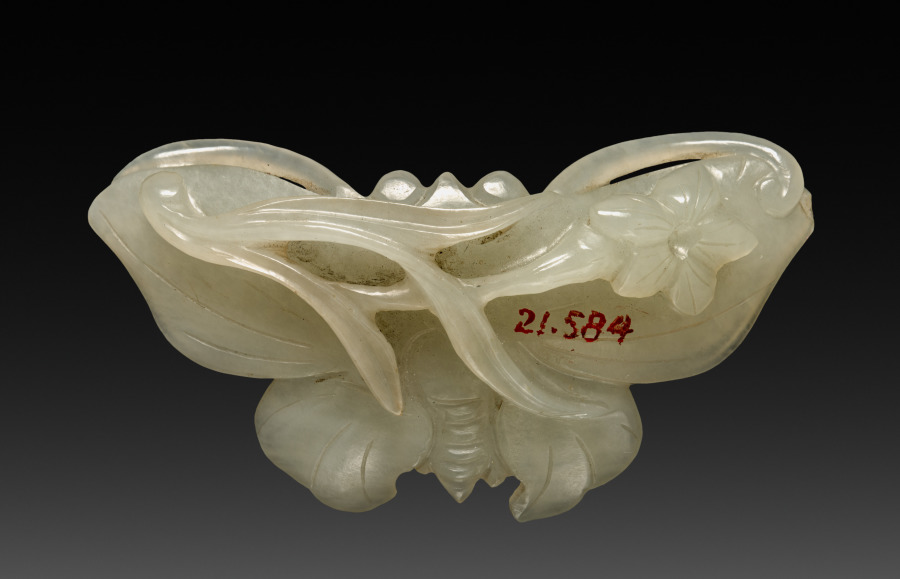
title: Butterfly Pendant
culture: China, Qing dynasty (1644–1911), Qianlong reign (1736–95)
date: 1735–95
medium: jade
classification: Jade